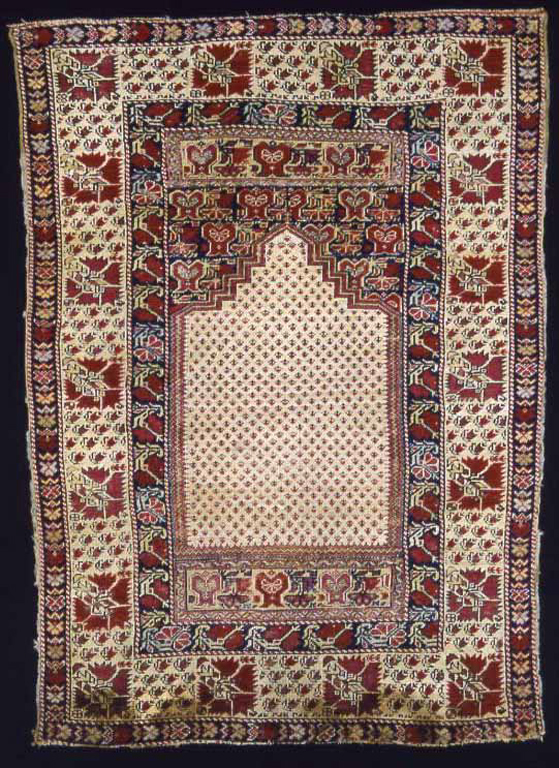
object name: Textile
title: Prayer Carpet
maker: Turkey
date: 1875/1900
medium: Wool, plain weave with supplementary wrapping wefts forming cut pile through a techniques known as "Ghiordes (Turkish) knots"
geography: Turkey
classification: textile; weaving - carpet